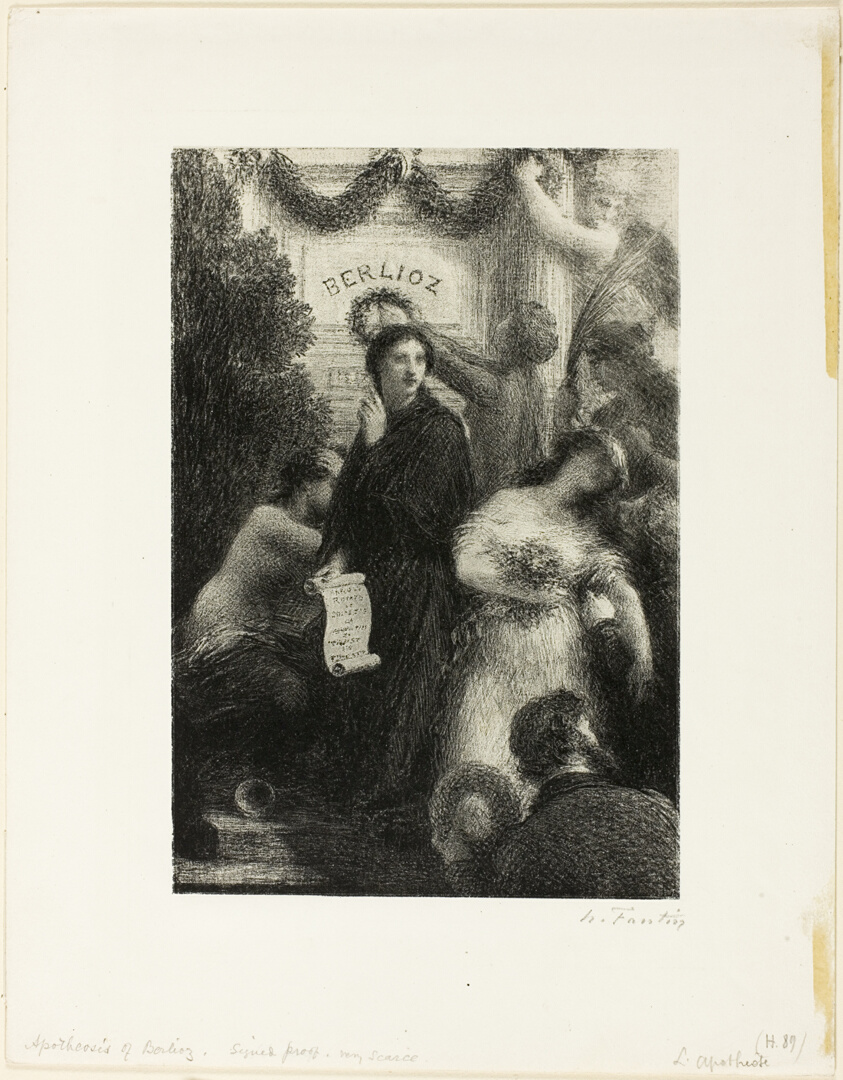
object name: Print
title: Apotheosis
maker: Henri Fantin-Latour (French, 1836-1904)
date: c. 1888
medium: Lithograph in black with scraping on stone on grayish-ivory chine laid down on cream wove paper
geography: France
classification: lithograph; print; prints and drawing